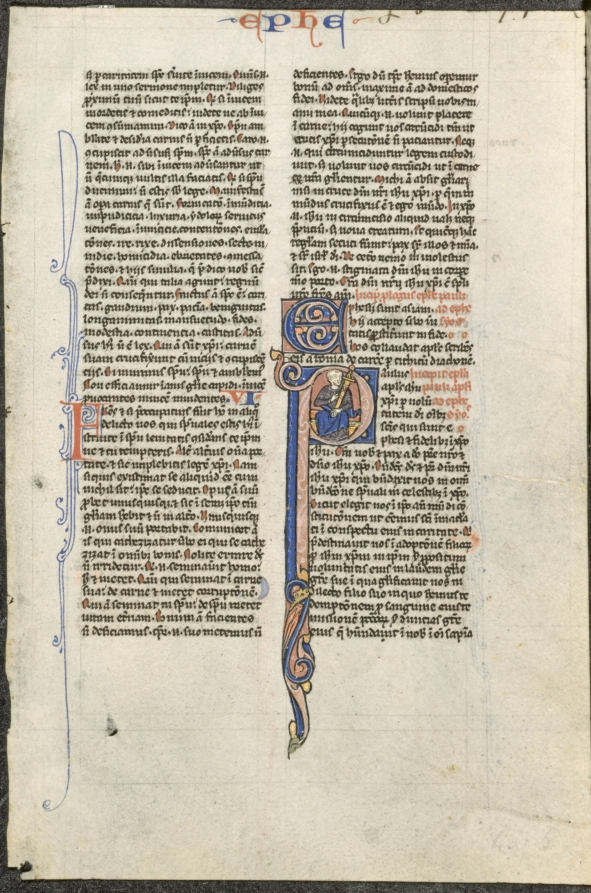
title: Leaf from a Latin Bible: Initial P with St. Paul Holding a Sword (St. Paul's Epistle to the Ephesians)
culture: France, Paris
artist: circle or workshop of Johannes Grusch Atelier (French)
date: c. 1250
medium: ink, tempera, and gold on vellum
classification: Manuscript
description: The Johannes Grusch Workshop is named for the priest responsible for copying one of its bibles in 1267. The shop first appeared on the scene during the late 1230s, and a group of 39 manuscripts has been identified. The workshop's oldest dated work is a missal made for Rouen Cathedral between 1235 and 1245. The style expressed by the Grusch artist consists of flat little figures with inked draperies of a fairly irregular sort. The bodies have white heads with small features, like the short-bearded chins of the men and pursed mouths. A large number of painters were apparently associated with this workshop, which changed its style considerably over its thirty-year period of activity. Its painting can be divided into early, middle, and late styles.